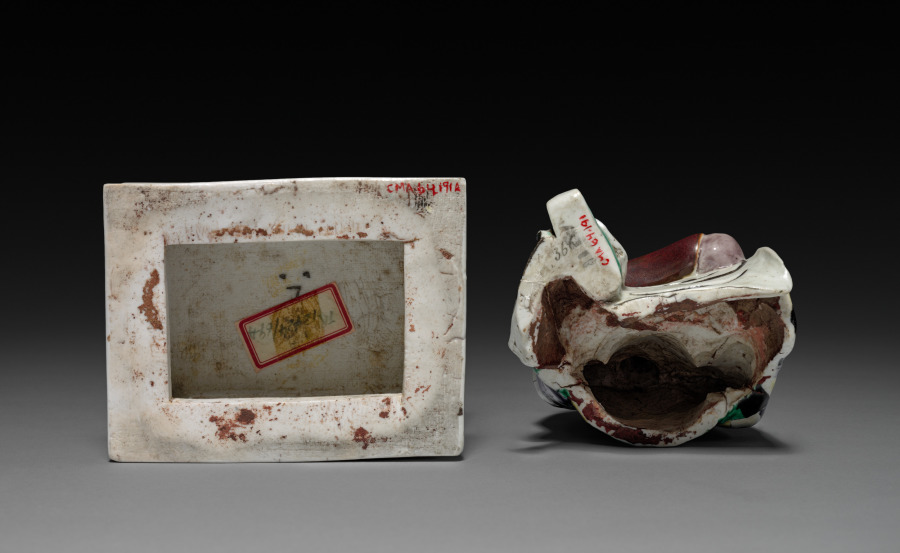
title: Lohan (Arhat) Holding a Peach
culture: China, Jiangxi province, Jingdezhen kilns, Qing dynasty (1644–1911), Kangxi reign (1662–1722)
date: 1662–1722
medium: porcelain with famille verte overglaze enamel decoration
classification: Ceramic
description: Lohan are disciples of Buddha with supernatural powers and eccentric behaviors. This lohan is holding the peach of longevity (shoutao), while its mate is holding the fu-dog, symbolizing good luck. With carefree smiles and playful gestures, these two figures embody a humorous attitude and a detachment from worldly affairs. This pair of porcelain figures was perhaps part of a house altar set or a decorative item in a household.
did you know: This lohan with a bald head wears a monk’s robe made of patches.